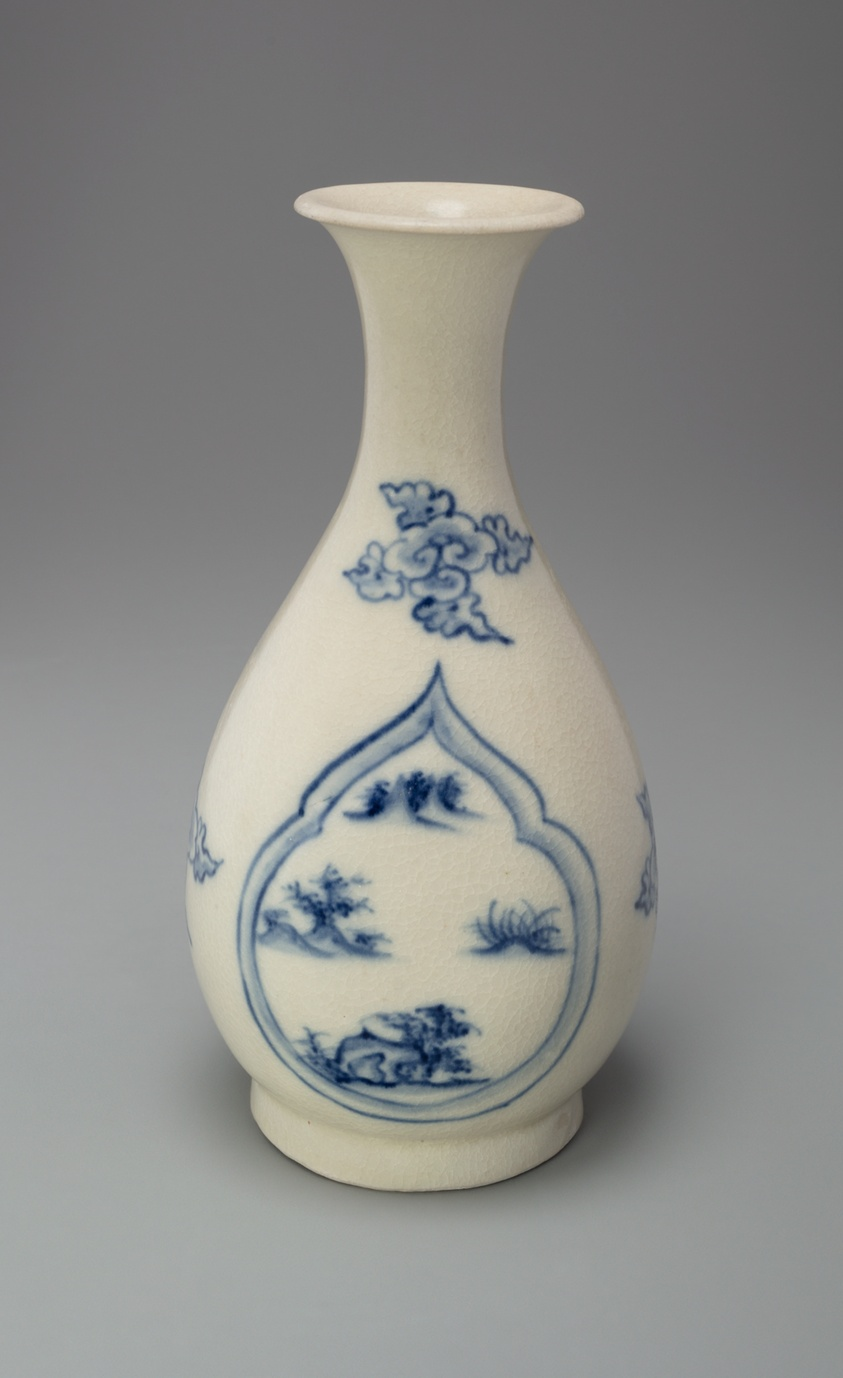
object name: Vessel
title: Pear-Shaped (Yuhuchun) Bottle with Everted Lip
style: Southeast Asian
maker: Vietnam; near Hoi An (offshore)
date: Late 15th/early 16th century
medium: Glazed stoneware with cobalt-blue underglaze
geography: Vietnam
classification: porcelain; vessel; bottle